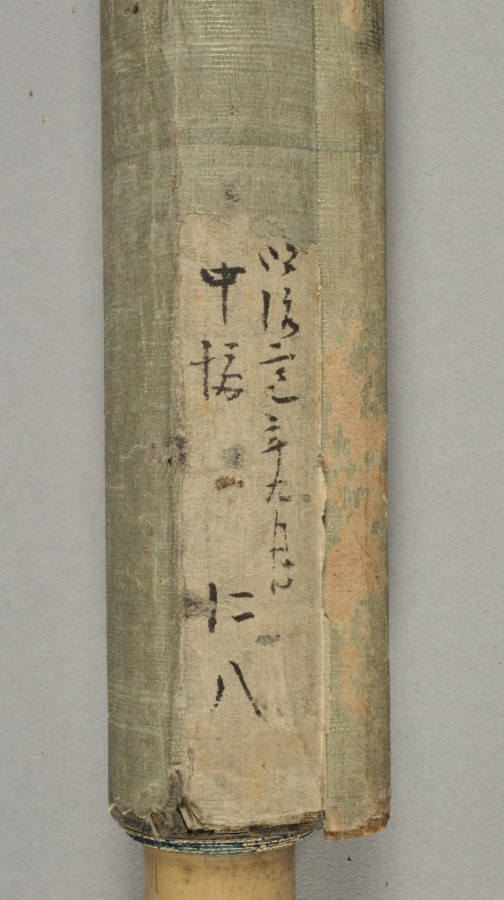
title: Ducks and Reeds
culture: Japan, Momoyama period (1573-1615) to Edo period (1615-1858)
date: early 1600s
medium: hanging scroll; ink on paper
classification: Painting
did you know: This painting was produced by a member of the Kano school.